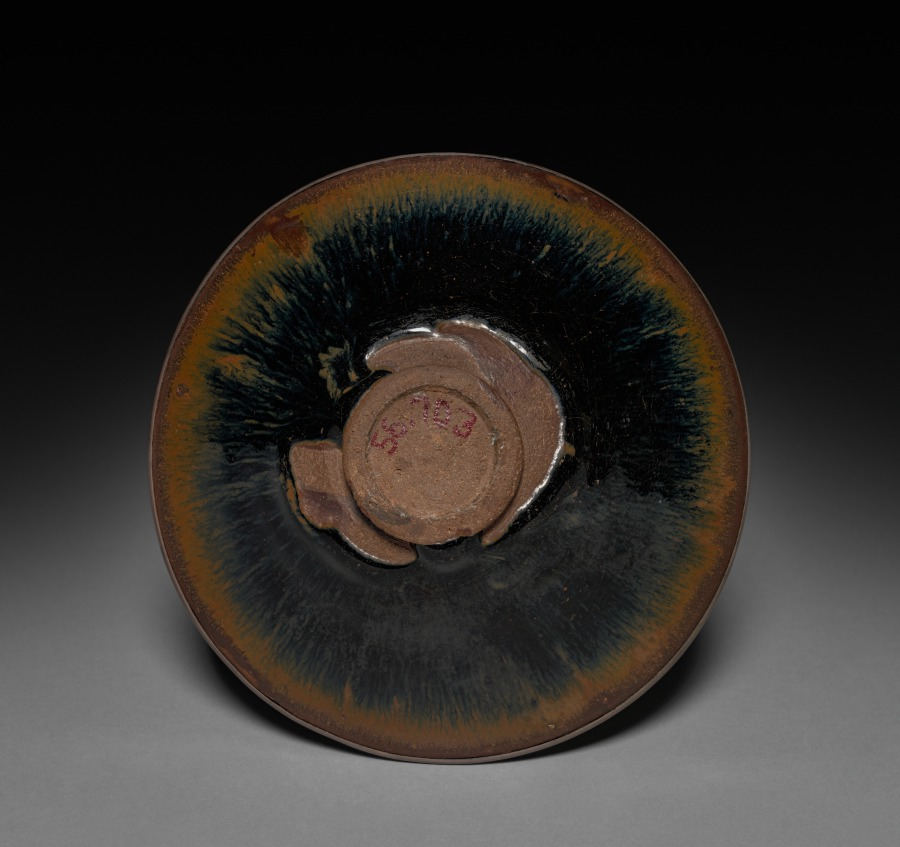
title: Tea Bowl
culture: China, Fujian province, Song dynasty (960-1279)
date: 960– 1279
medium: brown stoneware with iron slip glaze, Jian ware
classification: Ceramic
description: This tea bowl's coarse brown stoneware body was first covered with a thick, blue-black glaze. It was mottled with reddish-brown slip, whose pattern of streaks and spots are affectionately termed "hare's fur" among connoisseurs.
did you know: Jian ware was very popular with the tea cultures in China and Japan.